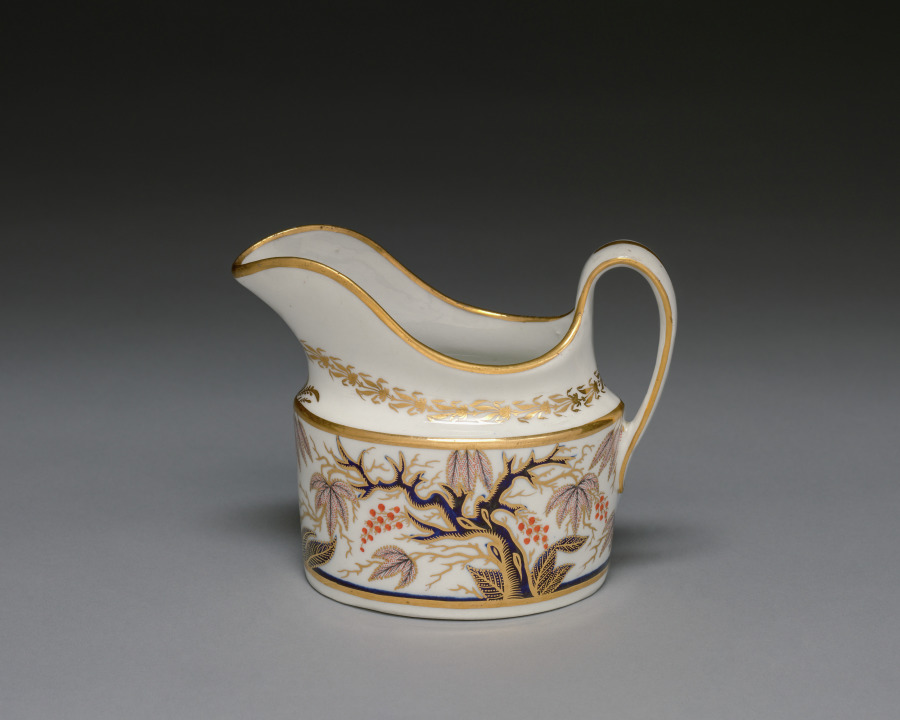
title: Cream Pitcher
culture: England, Staffordshire, late 18th Century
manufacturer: Spode Factory (British)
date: late 1700s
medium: ceramic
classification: Ceramic